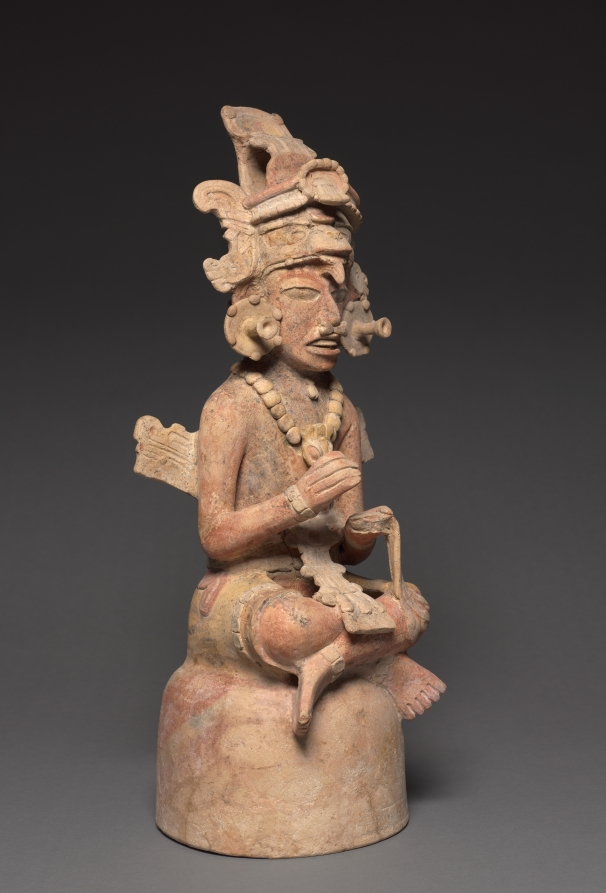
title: Artisan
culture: Guatemala, Petén region, Maya style (250-900), Maya style (250-900)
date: 250–600 CE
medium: earthenware with colored slips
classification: Sculpture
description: These figures represent the supernatural patrons of the visual arts and writing: the brothers Hun Batz and Hun Chuen ("One Monkey" and "One Artisan"). The two were refined artists but also bullies who tormented their younger brothers, who took revenge by transforming their elders into monkeys. Many Maya representations of the painter-scribes immortalize this fate by depicting the pair with both simian and human features, as here. The brothers are shown engaged in artistic or scribal pursuits. Sitting on high-domed bases that may have served as the lids of incense or offering bowls, each apparently once grasped a tool in his upper hand—for instance, a paint brush or a stylus for writing. In the lower hand, one cradles a small mask and the other, a piece of bark that likely refers to the beaten bark from which the Maya made books.